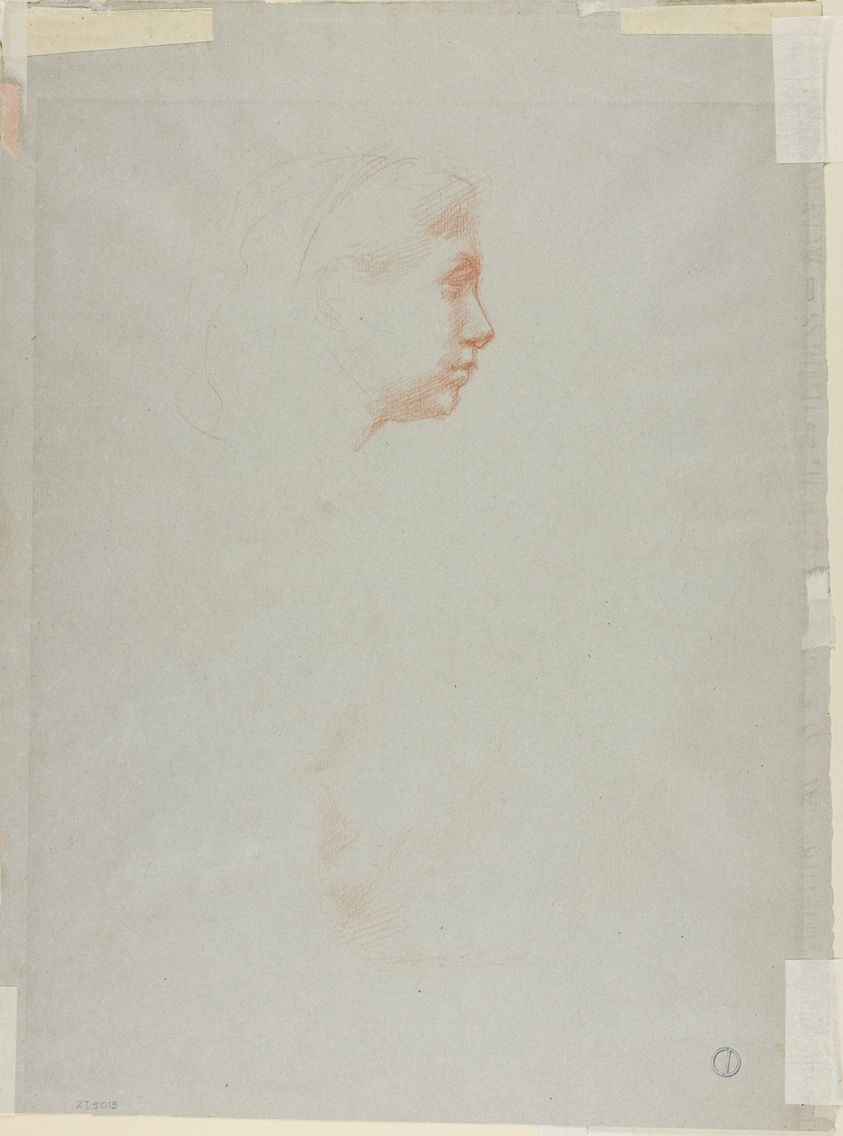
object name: Drawing and Watercolor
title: Bust of a Young Girl (recto); Profile of a Young Girl (verso)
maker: Paul Adolphe Rajon (French, 1843-1888)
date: 1886 (recto); c. 1886 (verso)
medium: Red chalk transfer (recto), and red chalk (verso), on gray wove paper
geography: France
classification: chalk; drawings (visual works); prints and drawing